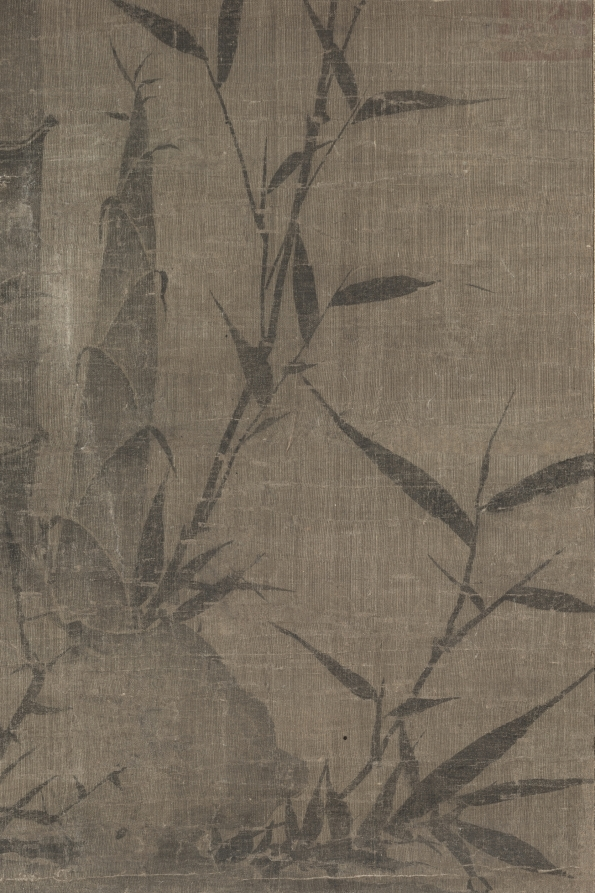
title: Bamboo in Four Seasons: Autumn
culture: China, Yuan dynasty (1271-1368)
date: 1279–1368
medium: hanging scroll, ink on silk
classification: Painting